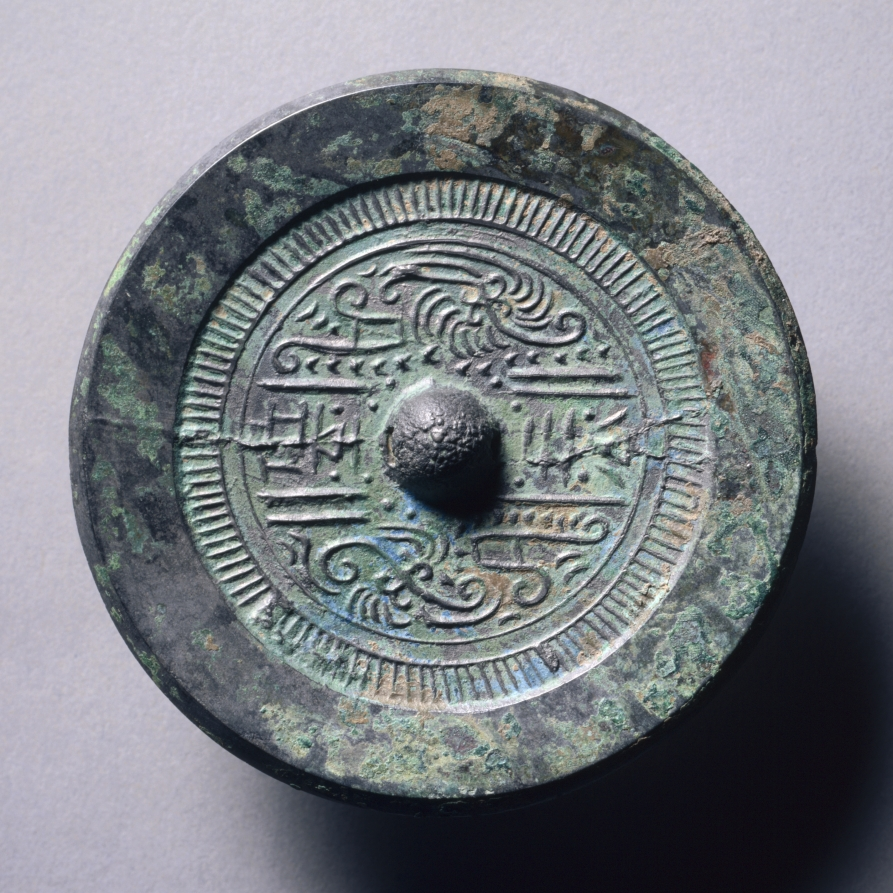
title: Mirror with Paired Phoenixes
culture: China, Eastern Han dynasty (25–220 CE)–Western Jin dynasty (265–316)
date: 25–316 CE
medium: bronze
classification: Metalwork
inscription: 位至三公